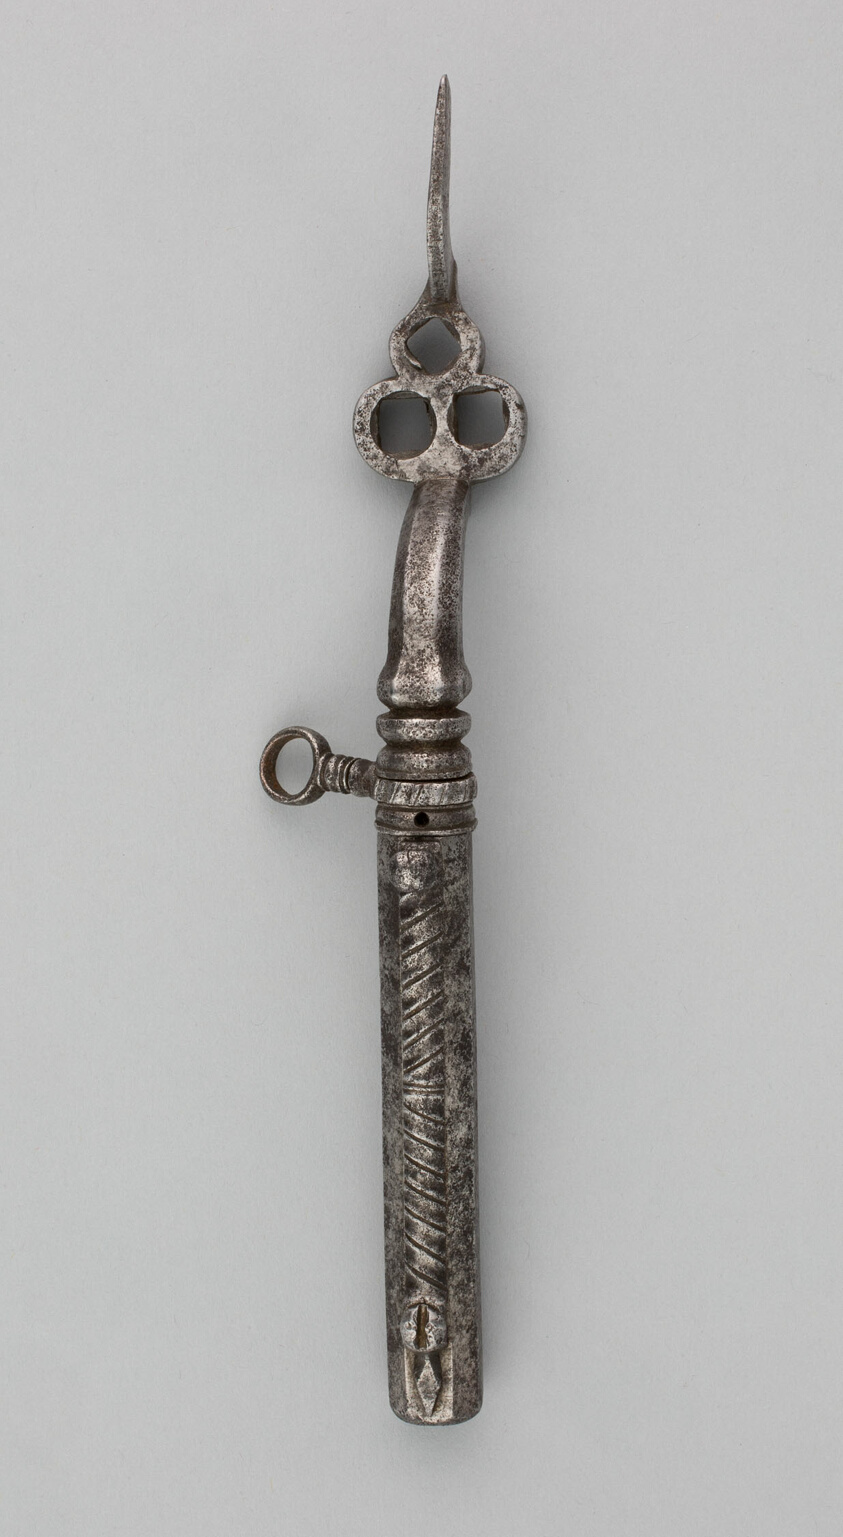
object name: Arms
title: Wheellock Spanner with Powder Measure and Screwdriver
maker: German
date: 17th century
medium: Iron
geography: Germany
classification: firearm-accessory; arms; arms and armor